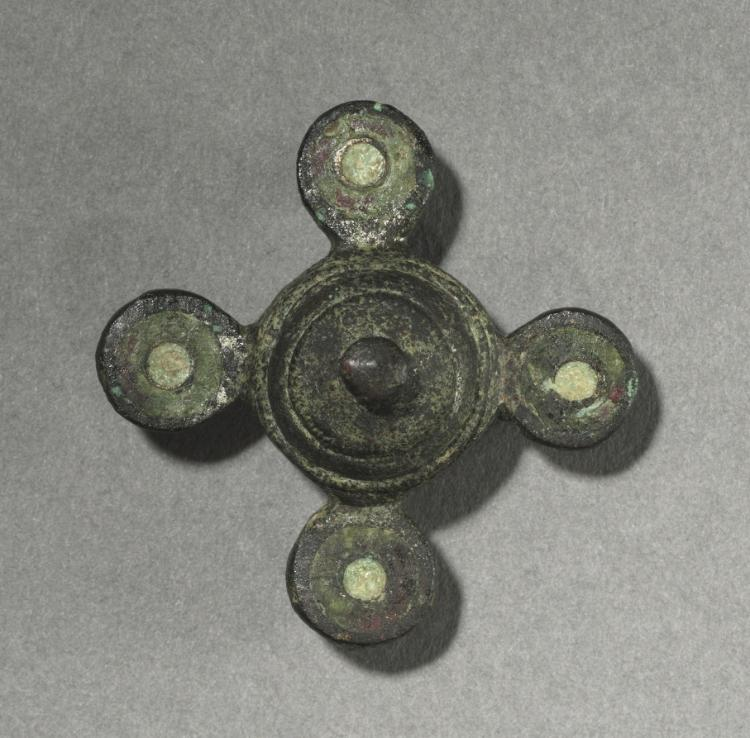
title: Ornamental Brooch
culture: Gallo-Roman or Romano-British, Migration period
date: c. 100–300 CE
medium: bronze and enamel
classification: Jewelry